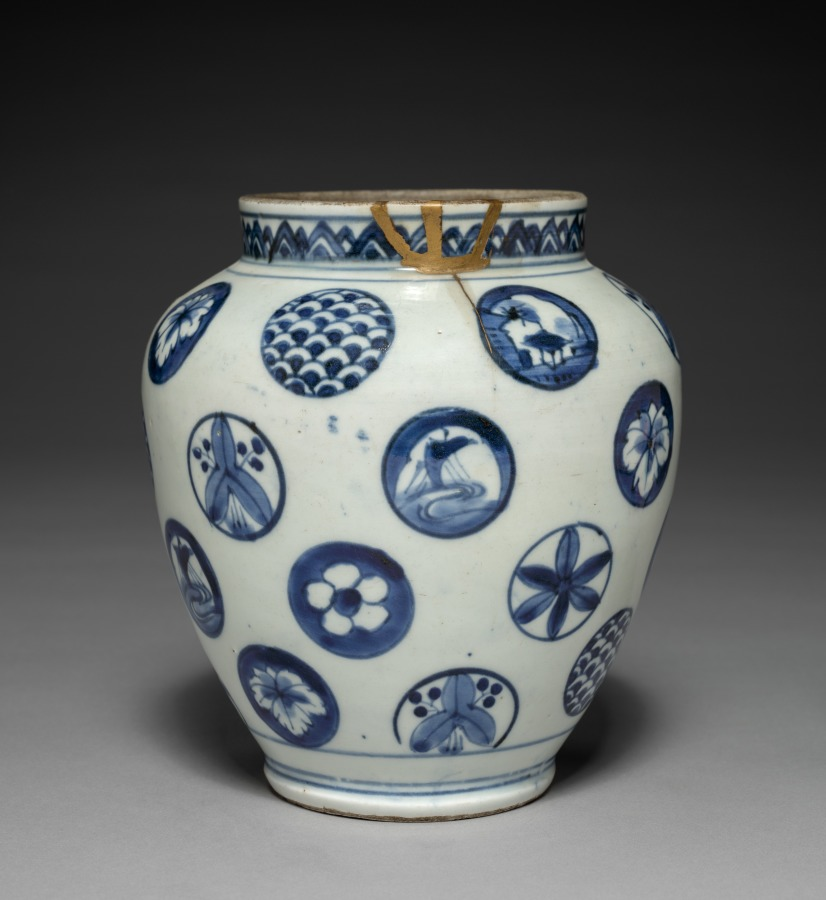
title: Jar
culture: Japan, Edo period (1615–1868)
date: early to mid-1800s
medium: porcelain with underglaze blue (Hizen ware, Arita type, Imari style)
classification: Ceramic